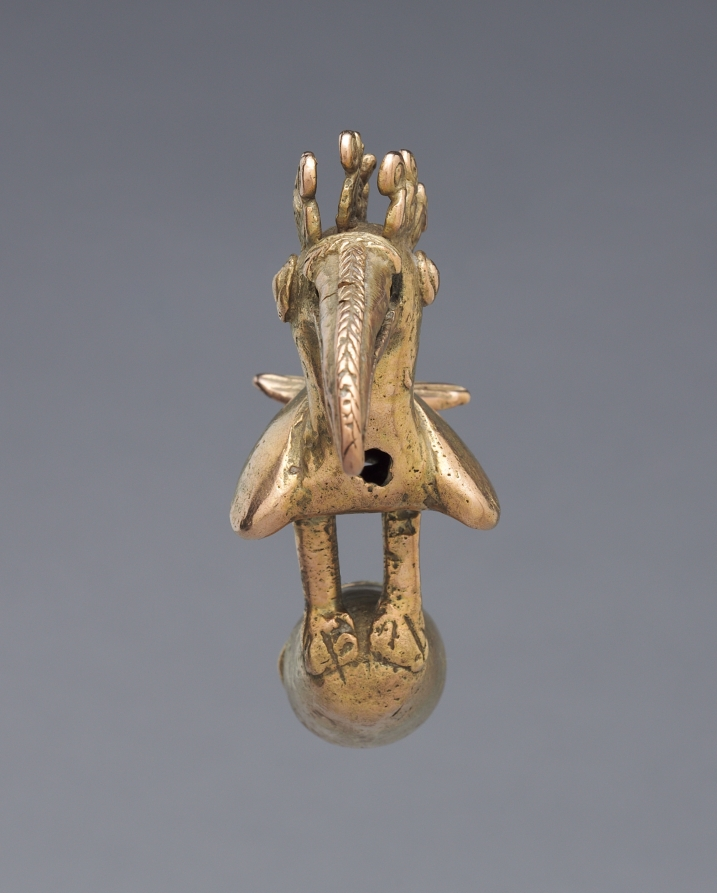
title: Staff Head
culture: Colombia, Sinú style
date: 400–1000 CE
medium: cast gold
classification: Metalwork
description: These finials probably fit over the ends of wooden staffs, emblems of rank. Unique to the Sinú area are finials with an image, often a bird, at a right angle to the base. This orientation suggests that the finials served as the finger grips of ceremonial spear throwers.